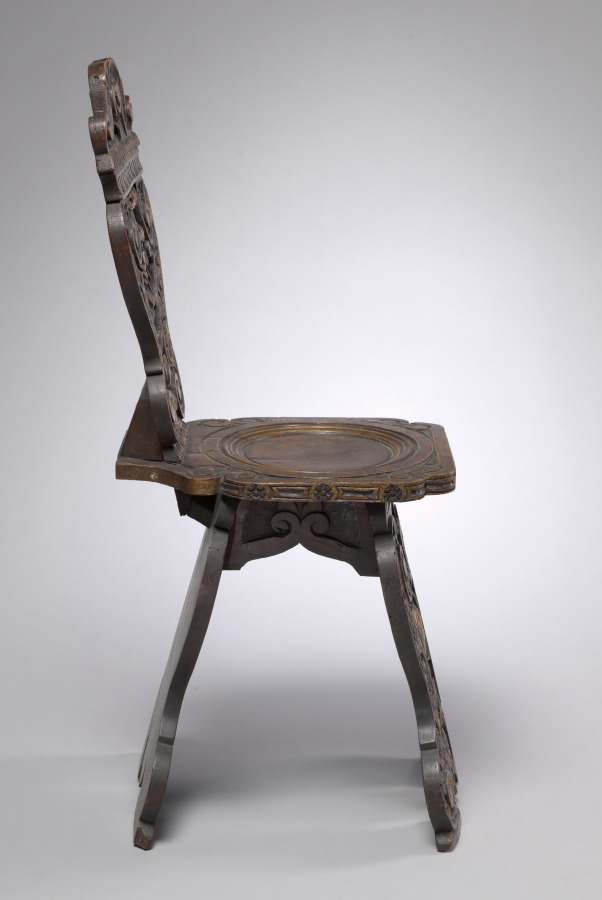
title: Chair, Sgabello type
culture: Italy, late 16th century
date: late 1500s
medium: walnut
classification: Furniture and woodwork